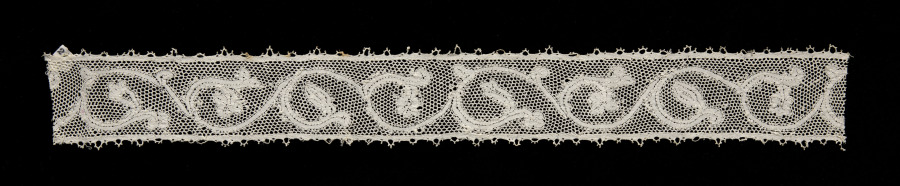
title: Lace Insertion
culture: Italy, Milan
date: 1600s–1700s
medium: Bobbin lace (Punto di Milano)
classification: Lace